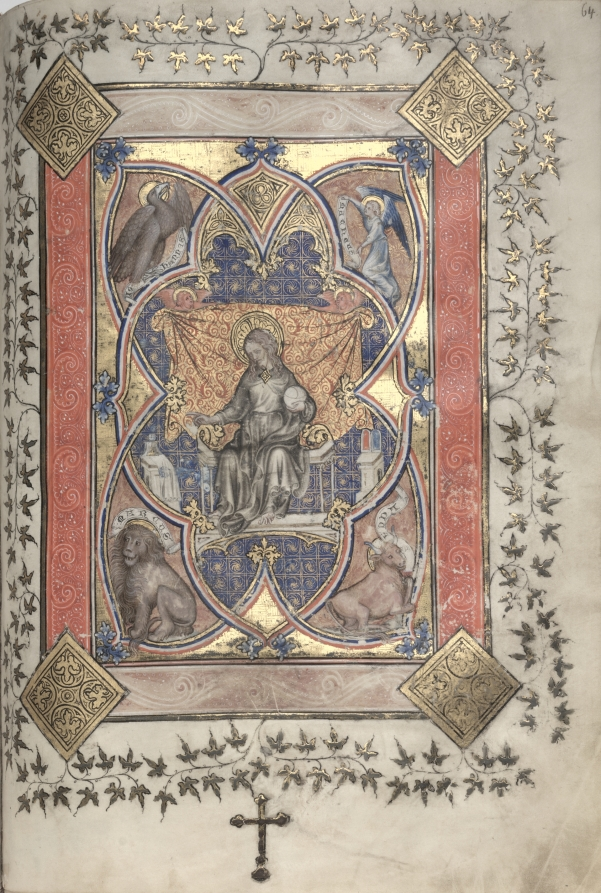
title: The Gotha Missal: Fol. 64r, Christ in Majesty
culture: France, Paris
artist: Master of the Boqueteaux (French)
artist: and Workshop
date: c. 1375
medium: ink, tempera, and gold on vellum; blind-tooled leather binding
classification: Bound Volume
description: The style and quality of this manuscript's decoration is typical of deluxe Parisian books made for aristocratic or royal patrons. Most of the book's decoration appears to be the work of the Master of the Boqueteaux, an artist active at the court of King Charles V (died 1380). His style was apparently shared by a number of book illuminators working in and around Paris. It is very possible that the Gotha Missal belonged to Charles V, but is not provable because the manuscript has no royal portraits and lacks a colophon. Given the book's magnificent decoration, however, it would seem that it was produced for a Valois prince, if not for the king himself. The manuscript receives its name from the German dukes of Gotha, its later owners.